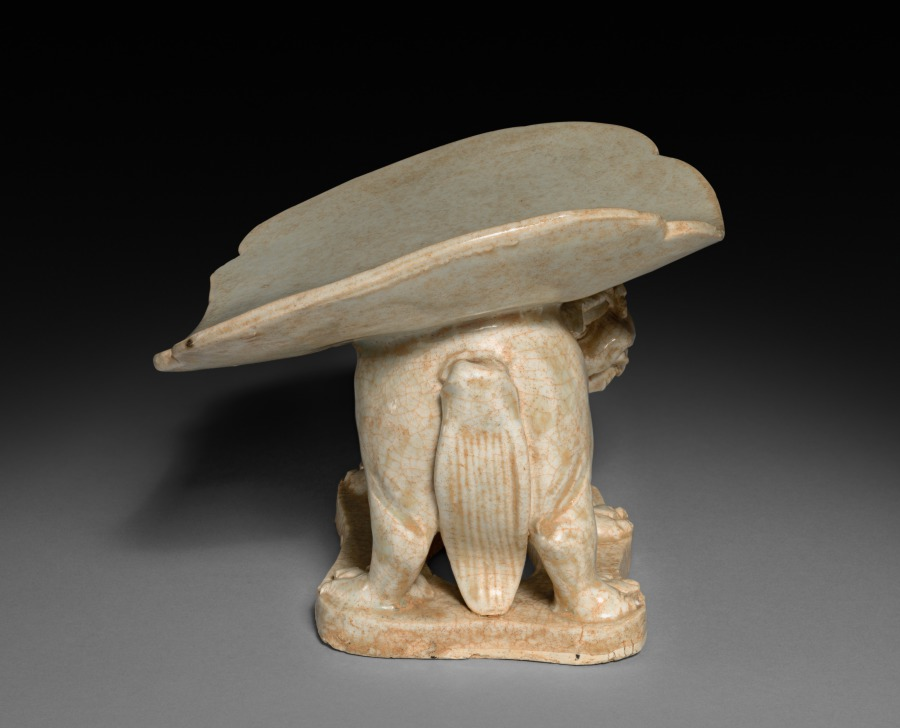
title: Pillow with Lion Base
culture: China, Northern Song dynasty (960-1127)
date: 1000s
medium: Glazed stoneware, qingbai ("blue-white") ware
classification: Ceramic